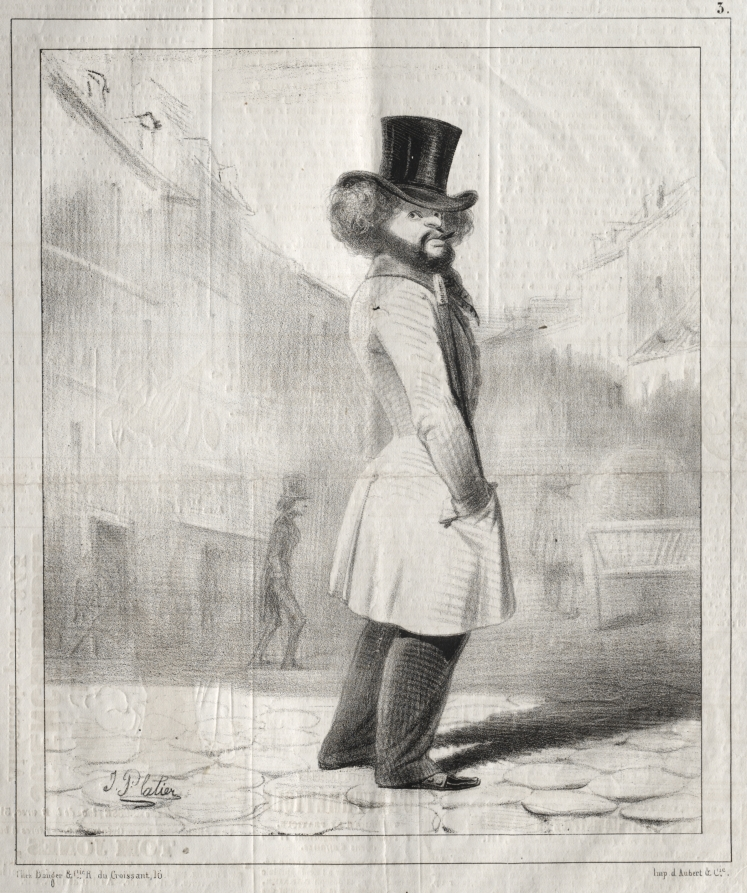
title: Le Lion de bas étage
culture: France, 19th century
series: Les Lions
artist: Jules Platier (French)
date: c. 1840s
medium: lithograph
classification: Print